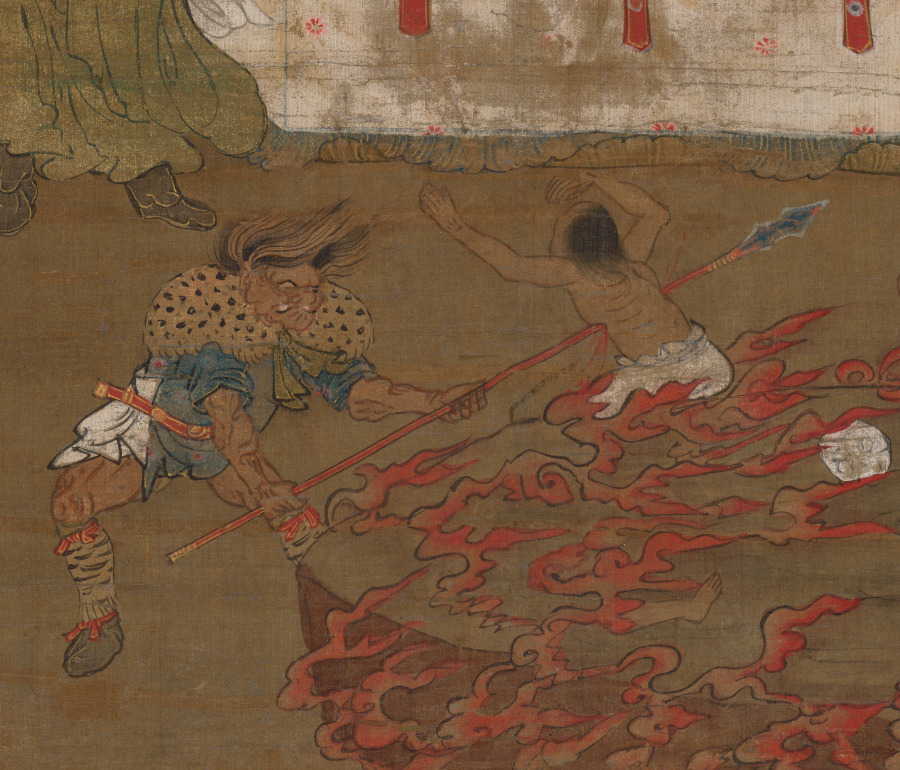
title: The Fourth King of Hell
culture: Korea, Goryeo dynasty (918–1392)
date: late 1300s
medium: Hanging scroll; ink, color, and gold ink on silk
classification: Painting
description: Originally part of a set of ten, this hanging scroll depicts the Fourth King of Hell. Accompanied by his secretary, the king with bulging eyes is seated at the center, overseeing how well his verdict is being conducted. On the bottom, sinners are suffering in a giant cauldron filled with boiling water, constantly pierced by a guard’s burning spears. Ready-made Buddhist paintings from China, created in professional workshops in the port city of Ningbo, are believed to one of the important inspirations for this hell scene.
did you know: As the concept of salvation became increasingly more emphasized in Buddhist schools in medieval East Asia, the gruesome depiction of various hells was given an important role: to promote Buddhist ethics. In the Buddhist infernal otherworld, the Ten Kings of Hell serve as judges of the deceased to determine their fates, including the type and severity of punishment.